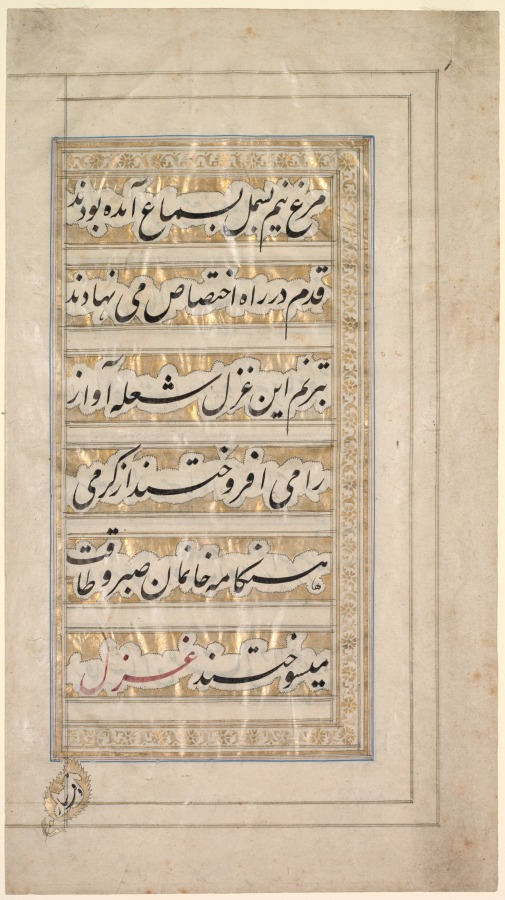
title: Page from the Poem of Beauty and Love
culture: India, Kashmir, Mughal, 19th century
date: 1848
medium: painting on paper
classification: Painting